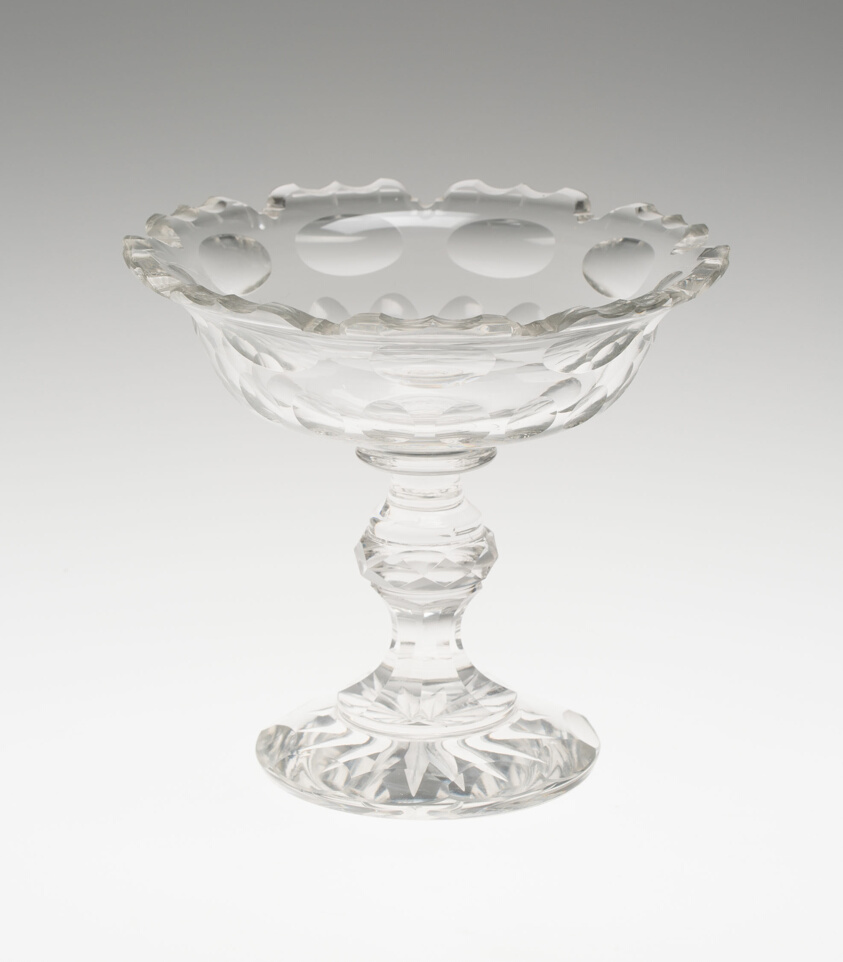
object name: Glass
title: Sugar Basin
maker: England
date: 18th century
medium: Glass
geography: England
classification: glass